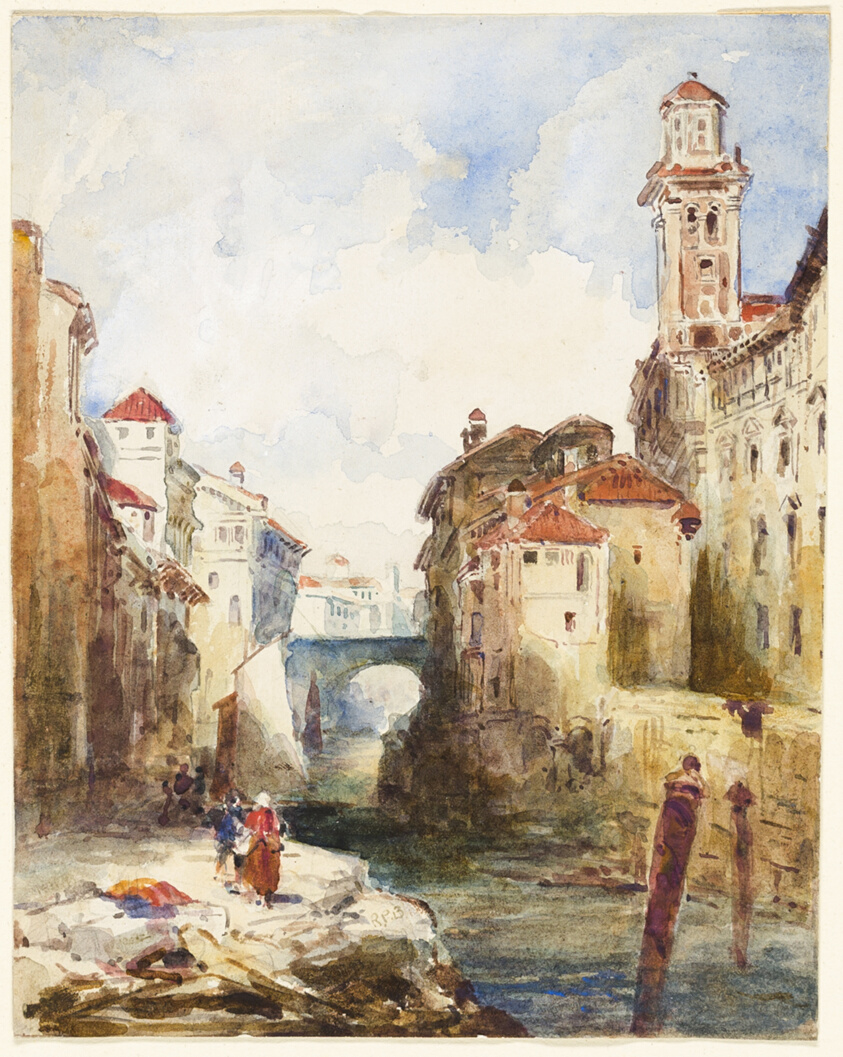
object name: Drawing and Watercolor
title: French Town, Buildings and River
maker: Richard Parkes Bonington (English, 1802-1828)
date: 1821/8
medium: Watercolor on paper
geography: England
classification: watercolor; drawings (visual works); prints and drawing